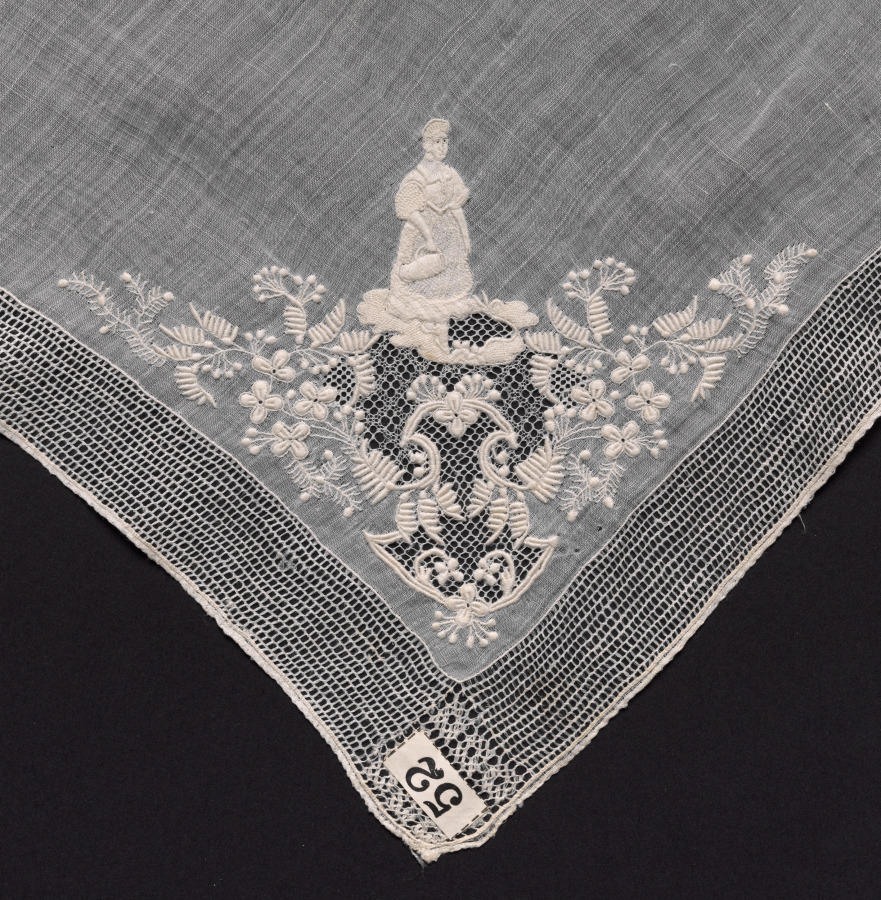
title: Embroidered Handkerchief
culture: Italy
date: 1700s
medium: Plain weave linen with needle lace (drawnwork) and embroidery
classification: Embroidery